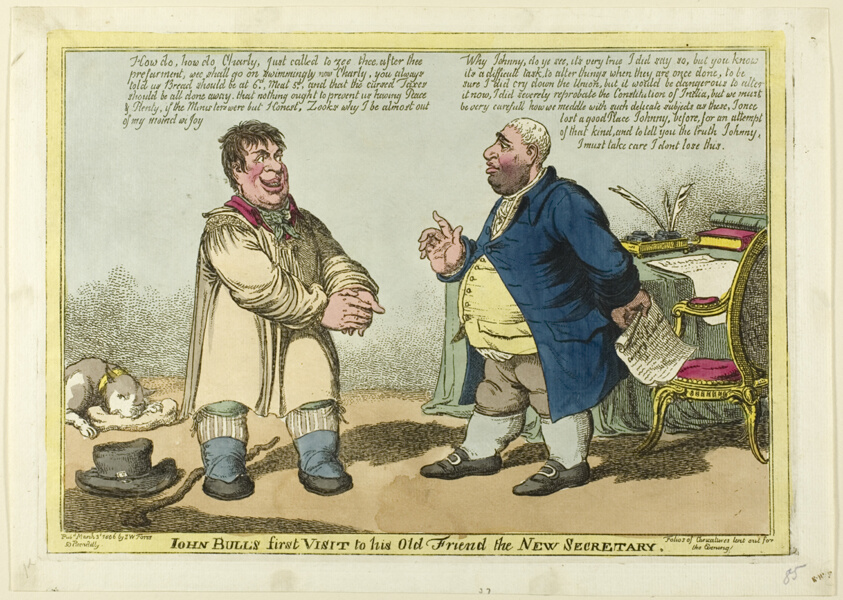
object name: Print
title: John Bull's First Visit to his Old Friend the New Secretary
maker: Charles WIlliams (English, active 1797-1830); published by S. W. Fores (English, active 1785-1825)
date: published March 3, 1806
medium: Hand-colored etching on ivory laid paper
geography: England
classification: etching; print; prints and drawing